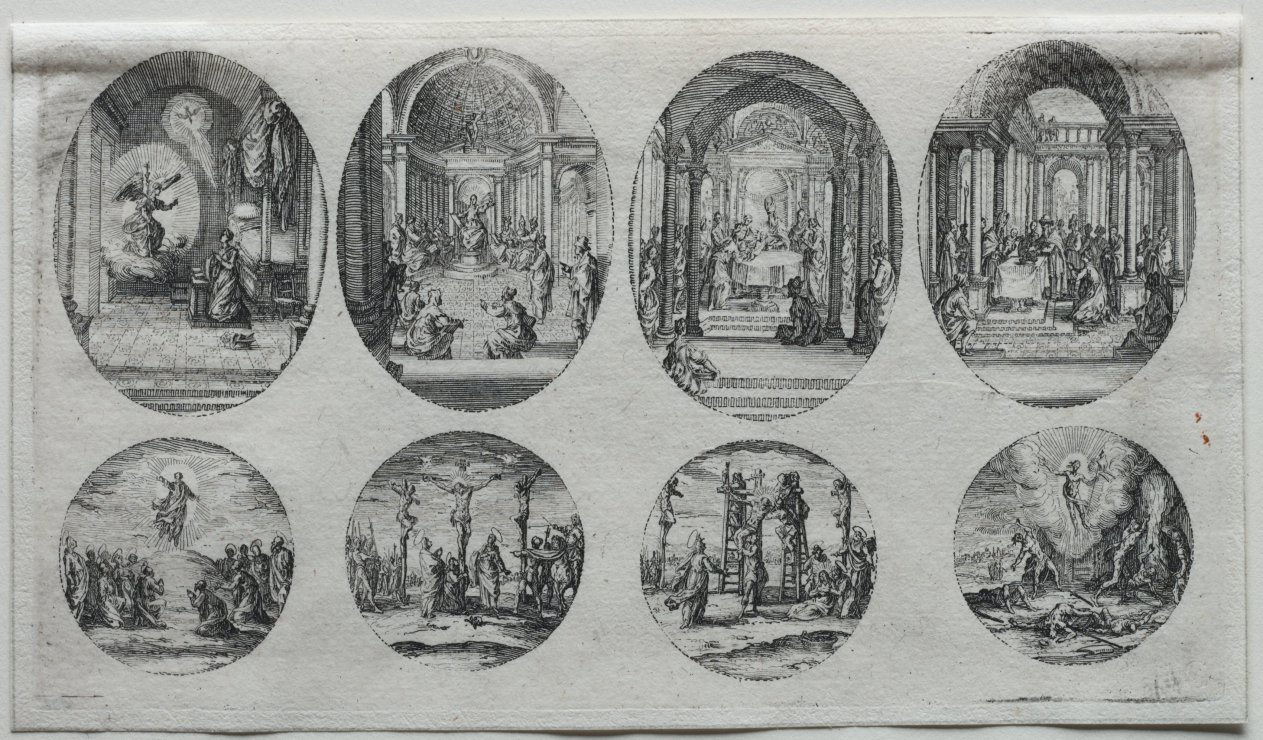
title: The Mysteries of the Passion: Christ Disputing with the Doctors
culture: France, 17th century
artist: Jacques Callot (French, 1592–1635)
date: 1631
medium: etching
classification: Print